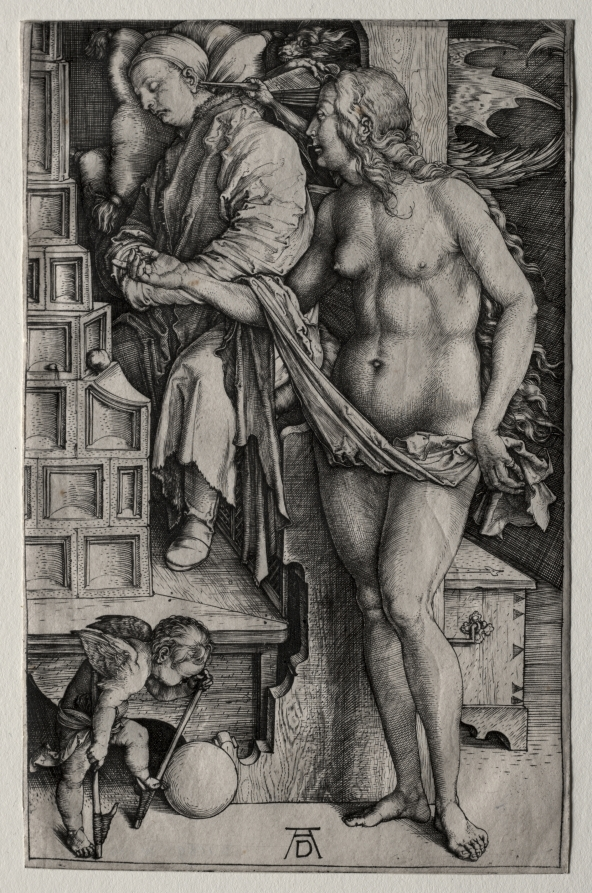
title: The Dream of the Doctor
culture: Germany, late 15th-early 16th Century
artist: Albrecht Dürer (German, 1471–1528)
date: c. 1500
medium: engraving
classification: Print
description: Scholars generally agree that this curious engraving represents the contemporary proverb "Idling is the pillow of the devil," a moral message against the sin of sloth. Here, a middle-aged scholar dozes before a warm stove. The devil hovers behind him and uses a fireplace bellows to kindle impure desires. Aroused by the devil’s sinful provocation, the scholar’s subconscious conjures Venus, an object of lustful temptation. Dürer’s image explores the realm of dreams and innermost thought in association with powerful female sexuality. Like many of his other engravings of this early period, Dürer uses obscure, moralistic stories to consider the female nude both creatively and intellectually. Although aimed at a primarily cultured male audience, Dürer presents Venus as a source of desire not only for the sinful idler, but for the viewer as well.